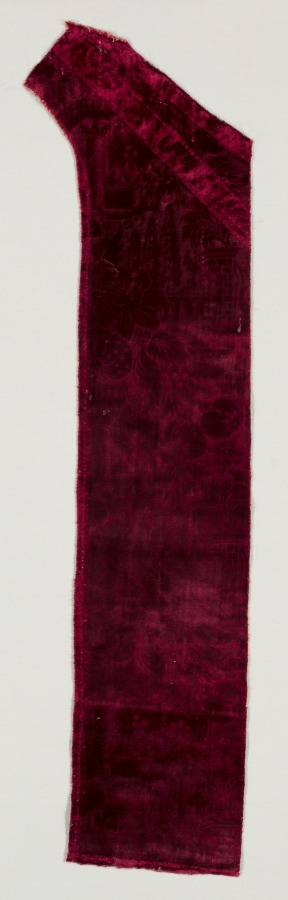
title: Fragments of a Chasuble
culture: Italy, 17th century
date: 1600s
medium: velvet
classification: Velvet